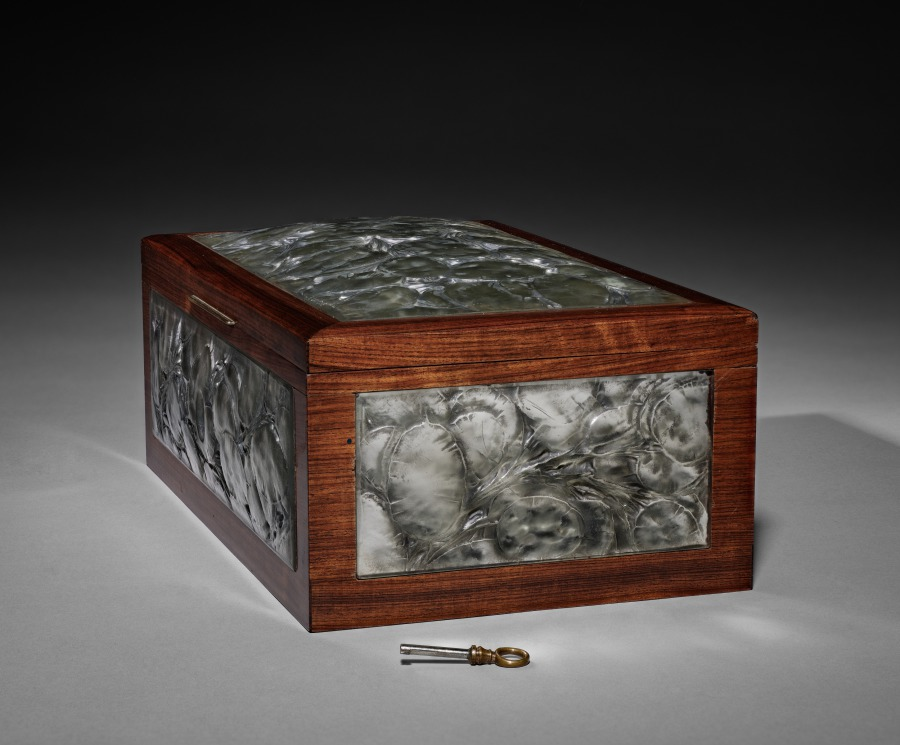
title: Monnaie du Pape Coffer (coffret)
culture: France, 20th century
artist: René Lalique (French, 1860–1945)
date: c. 1914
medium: wood, bombé glass panels with gray patina, metal key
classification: Mixed Media